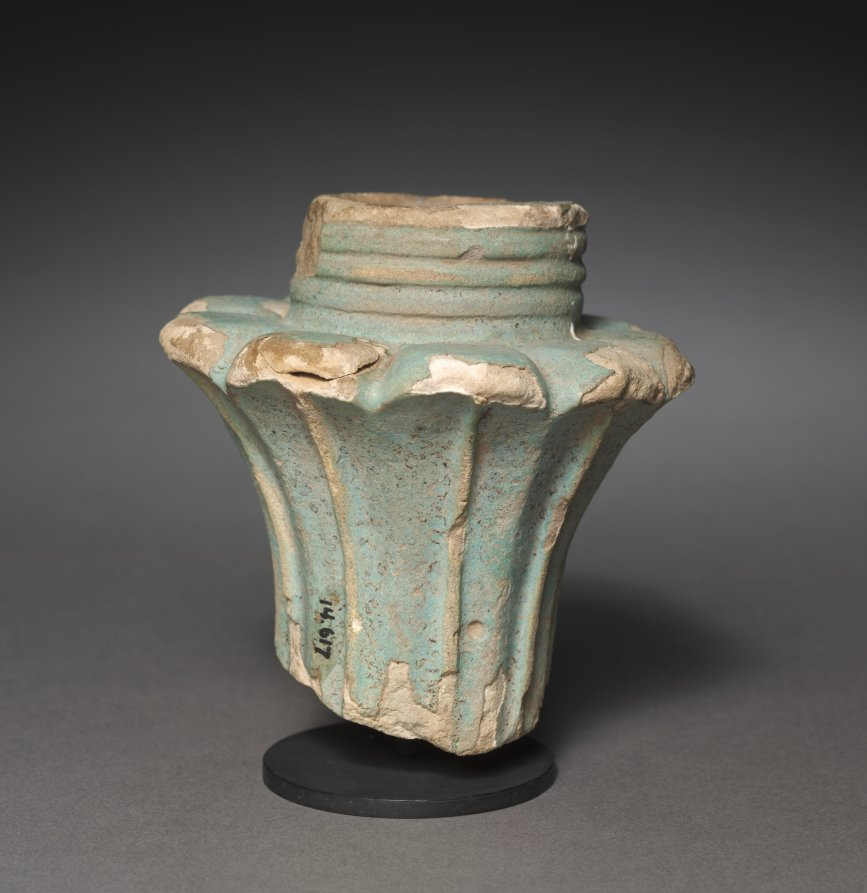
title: Votive Palm Column Capital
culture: Egypt, Greco-Roman period (332 BCE–395 CE), Roman empire (30 BCE–395 CE)(?)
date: 30 BCE–395 CE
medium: pale turquoise faience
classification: Sculpture